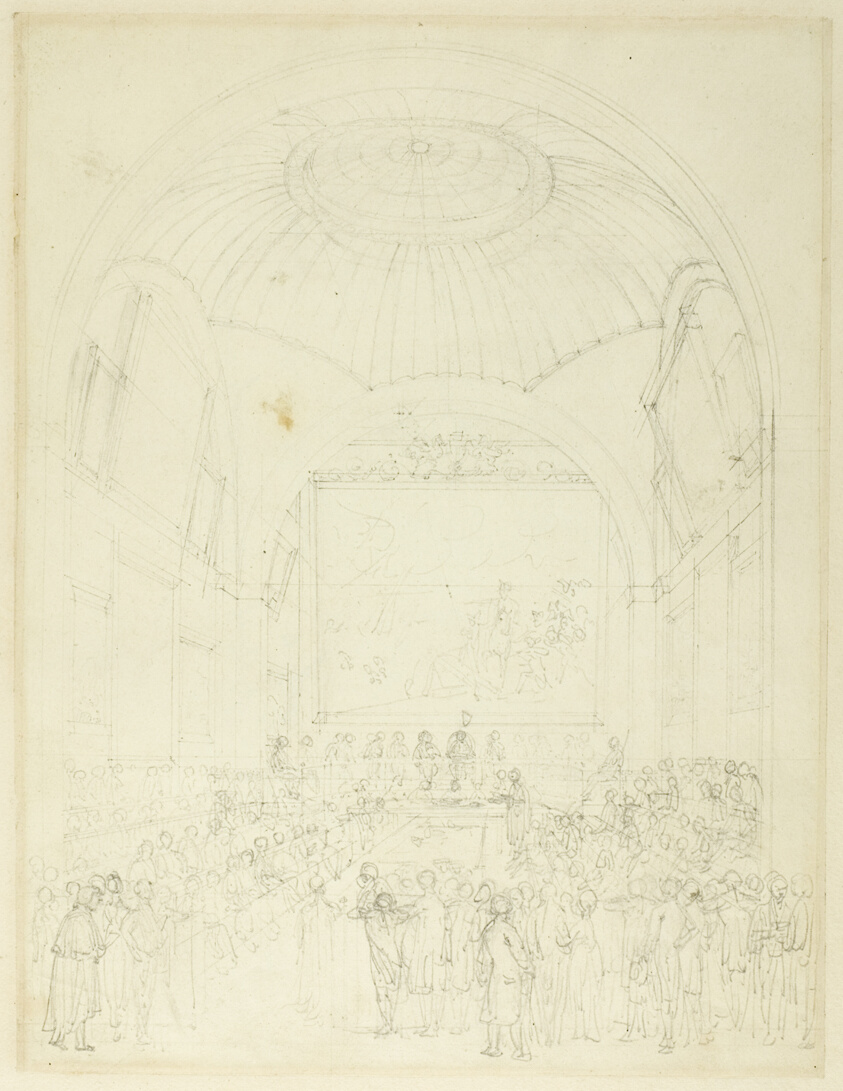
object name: Drawing and Watercolor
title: Study for Common Council Chamber, Guild Hall, from Microcosm of London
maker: Augustus Charles Pugin (English, born France, 1762-1832); Thomas Rowlandson (English, 1756-1827)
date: c. 1808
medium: Graphite on ivory wove paper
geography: England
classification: graphite; drawings (visual works); prints and drawing